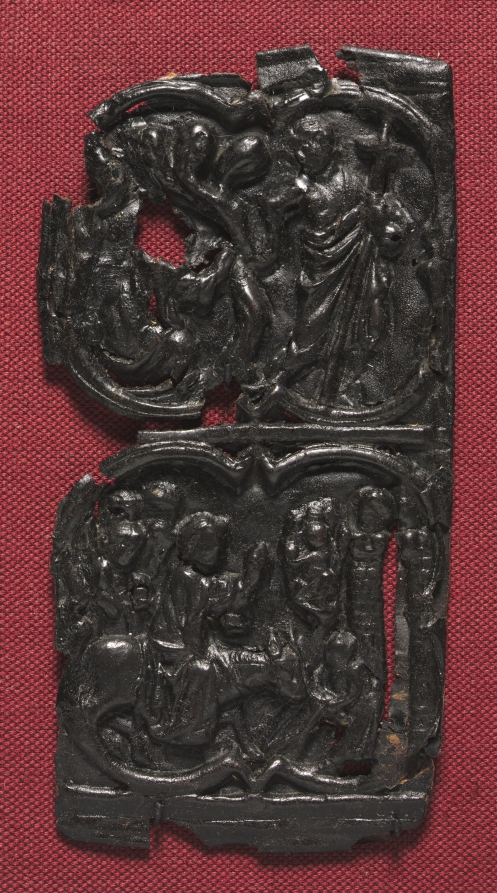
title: Leather Panel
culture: France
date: c. 1350–1400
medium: tooled leather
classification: Leather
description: This leather panel has been tooled into deep relief. It probably decorated a wooden casket. The two scenes represented are, above, Christ Appearing to Mary Magdalene after his resurrection--also known as the Noli me tangere ("Do not touch me")--and, below, Christ's Entry into Jerusalem.